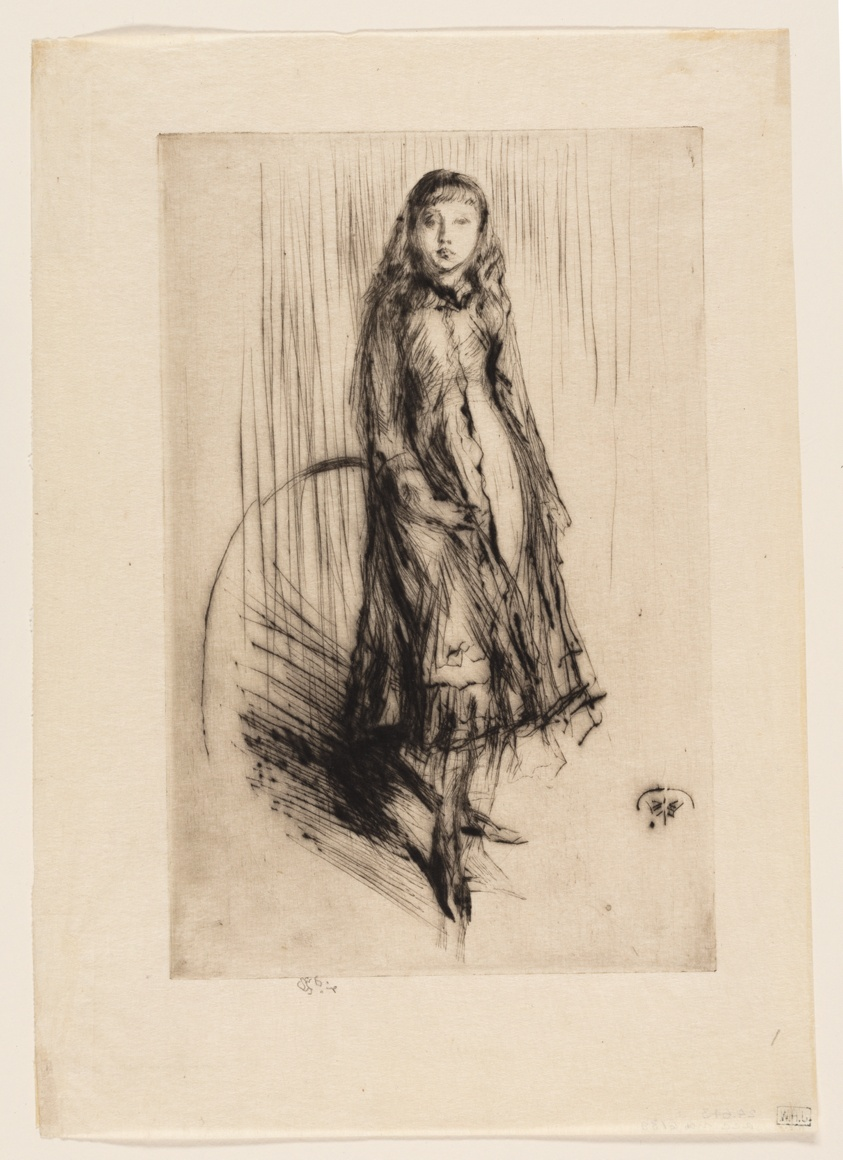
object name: Print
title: Florence Leyland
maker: James McNeill Whistler (American, 1834-1903)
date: 1874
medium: Drypoint in black ink on cream Japanese paper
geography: United States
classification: drypoint; print; prints and drawing; paper